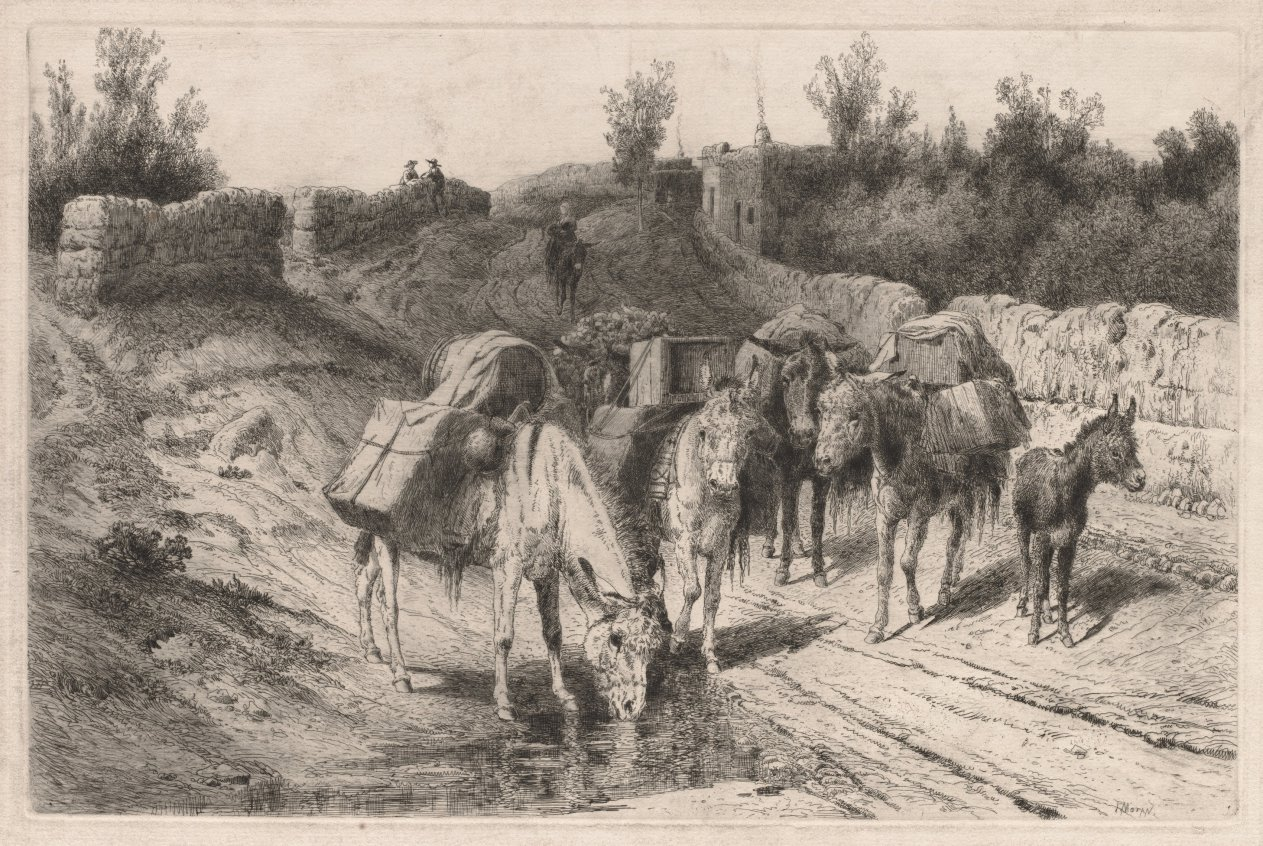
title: On the Road to Santa Fe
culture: America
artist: Peter Moran (American, 1841–1914)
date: 1884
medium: etching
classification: Print